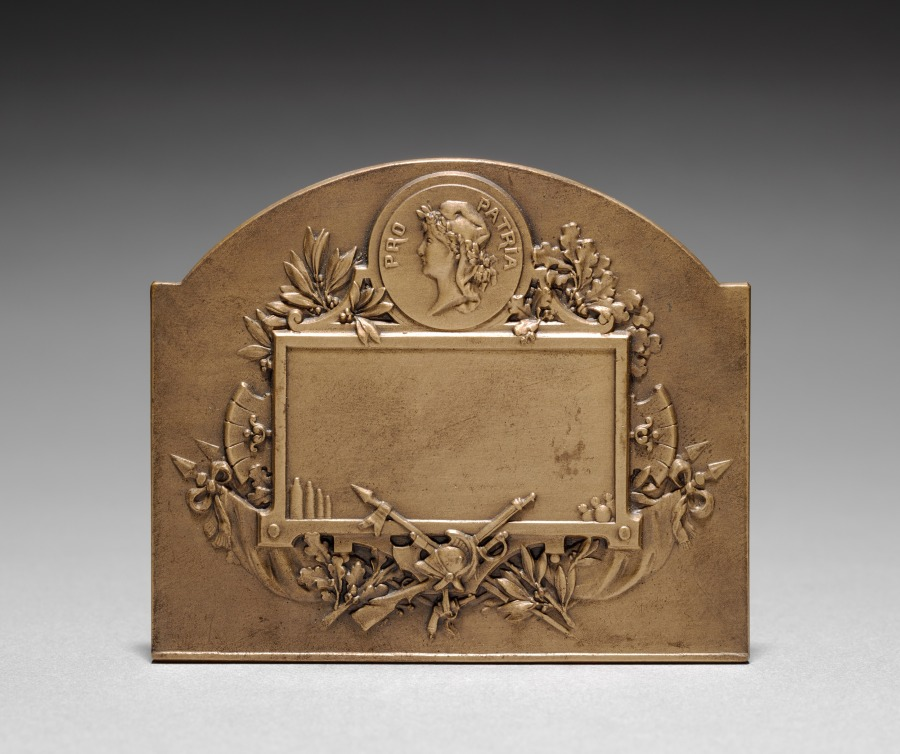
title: Medallion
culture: France, 19th-20th century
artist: Henri Emile Allouard (French, 1844–1929)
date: c.1915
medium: bronze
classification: Metalwork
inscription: "Pro Patria" (For our country); signed: "H. Allouard."